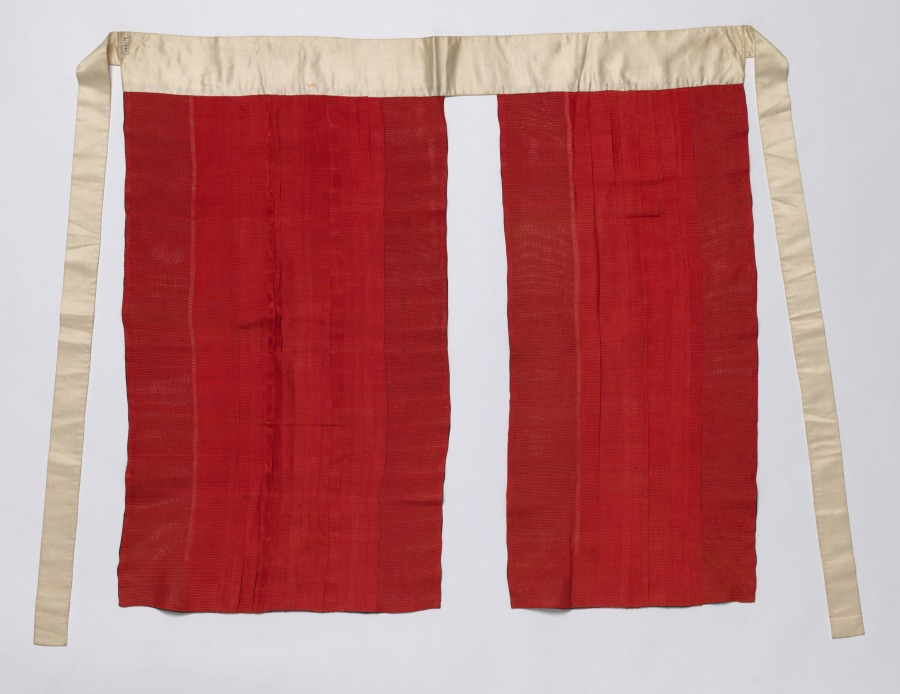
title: Skirt for the Royal Ceremonial Costume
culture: Korea, Joseon dynasty (1392–1910)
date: late 1800s–early 1900s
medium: red and black silk, gauze weave, with white silk satin waistband and ties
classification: Garment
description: This is a set of royal ceremonial robe and accessories worn by a high-ranking court official for attending special state ceremonies. The set consists of an inner coat, an outer coat, a skirt, a back apron, a crown, a pair of jade tassels, a tablet, and a belt.